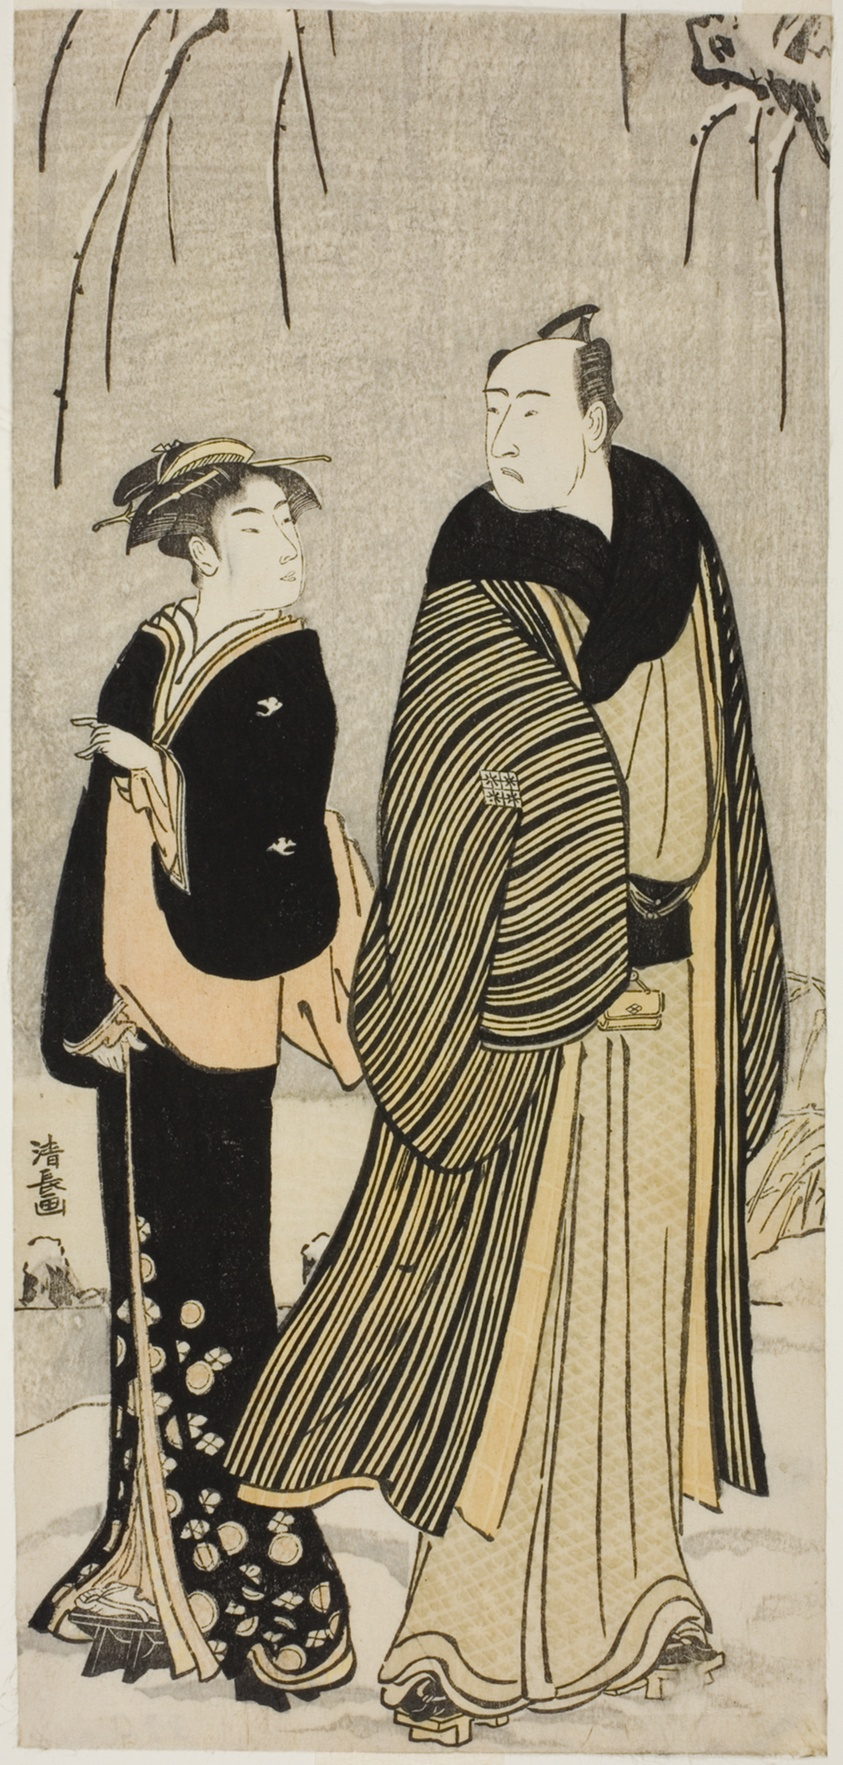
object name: Print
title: The Actor Matsumoto Koshiro IV and a geisha, from an untitled series of prints showing Actors in private life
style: Japanese (culture or style)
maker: Torii Kiyonaga (Japanese, 1752-1815)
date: c. 1783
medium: Color woodblock print; hosoban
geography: Japan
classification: woodblock print; print; asian art